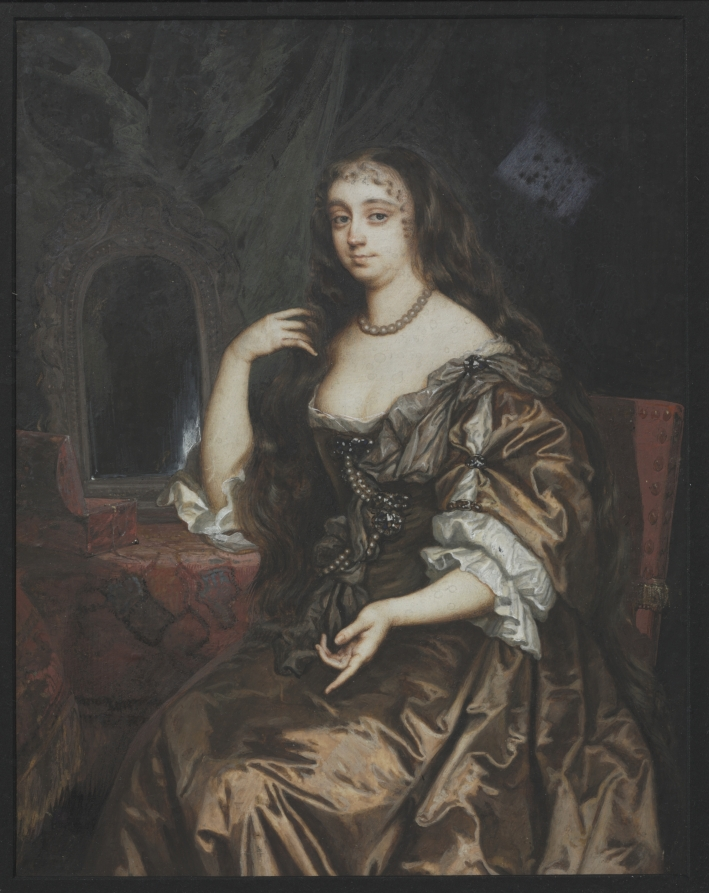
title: Portrait of Anne Hyde, Duchess of York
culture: England, 17th century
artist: Nicholas Dixon (British, c. 1708)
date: c. 1662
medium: watercolor on vellum in a large wooden frame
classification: Portrait Miniature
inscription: Label inside of back: Henry J. Murcott, London. Written in ink on backing: "Anny Hyde, first Wife of James II, Mother of Queen Mary II, Queen Anne. From Lord Currie's collection."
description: Though knowledge about his birth and training remain obscure, Nicholas Dixon is known to have been a favorite miniature painter of the English court at the close of the seventeenth century. He succeeded Samuel Cooper (1608/9–1672) as limner to King Charles II in 1673 and was Keeper of the King’s Picture Closet, for which he was granted an irregularly paid annuity of £200. Dixon painted a substantial number of ambitiously scaled miniatures—which became increasingly uncommon among practitioners of the art form when the more constrictive support of ivory supplanted vellum in the early 1700s. Dixon often signed his work with the monogram ND, and many of his large cabinet miniatures were copies of portraits, religious scenes, and mythological paintings by old masters, thirty of which formed part of the collection of the dukes of Portland. Among the characteristics of his style are ruddy flesh tones and drowsy eyes, and like the work of John Hoskins (c. 1590–1665), who may have been his teacher, Dixon favored softer modeling and diffuse lighting of his subjects, as opposed to the dramatic shadows employed by Cooper. Two lottery schemes—one in 1684/85 and the other in 1698— involving the exhibition of miniatures and the distribution of cash prizes proved disastrous for Dixon, who was in financial ruin by 1700 and constrained to sell a large number of works from the lottery. Anne Hyde (1637–1671), the sitter in this portrait, was around the age of twenty-four when the miniature was painted. She faces right and sits upon a dull red chair before a dressing table covered with a deep red embroidered cloth or tapestry that is fringed at the edges. A mirror and open jewel box lie on a table that is in front of a dark green curtain. The sitter has gray eyes and wears a golden brown satin décolleté dress with white ruffled undersleeves ornamented with jeweled closures. A necklace of large pearls hangs around her neck, and jeweled brooches fasten a winding rope of pearls to the bodice of her gown. Her right elbow rests on the table, and her fingertips comb through her long, wavy brown hair, which falls over her shoulders to below her waist. Her left arm extends toward her knee as she lightly holds a measure of her sash under her thumb while pointing downward with her index finger. The gracefully arranged, tapered fingers indicate Restoration court refinement.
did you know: This portrait is after a well-known and frequently copied oil painting by Peter Lely; it is nearly identical but with crimson and gold drapery in place of the dressing table and mirror.